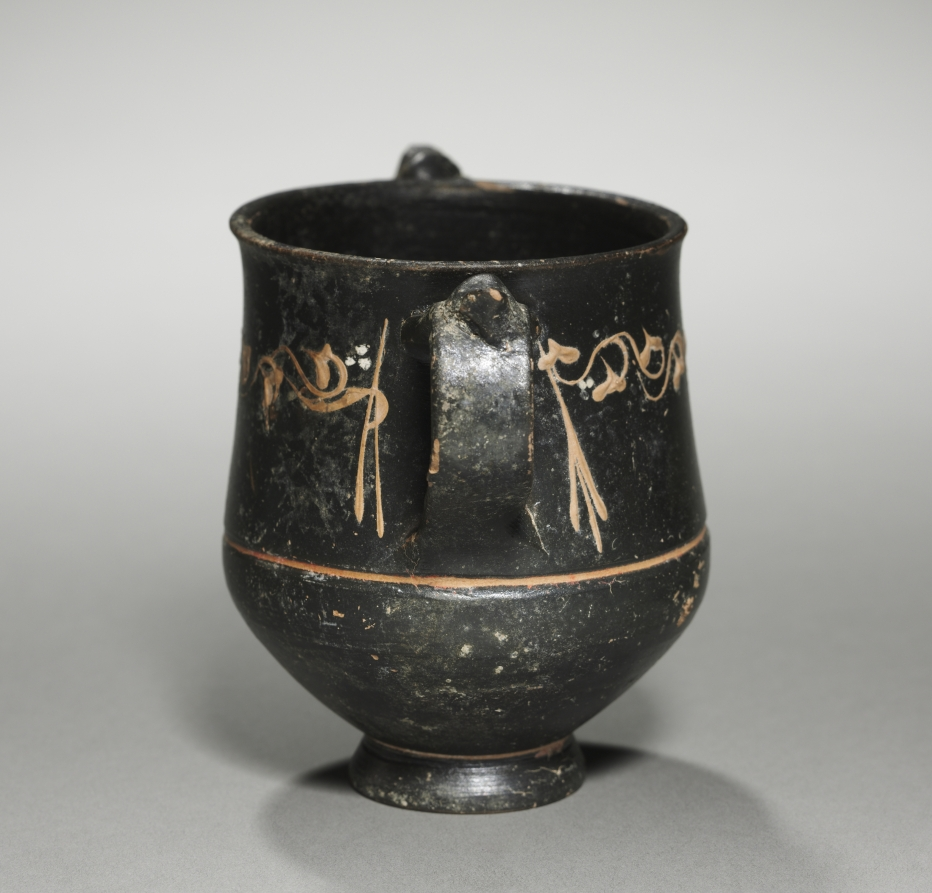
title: Black-Gloss Kantharos (Drinking Cup)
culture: Greek, Attic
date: c. 300–275 BCE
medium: ceramic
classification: Ceramic